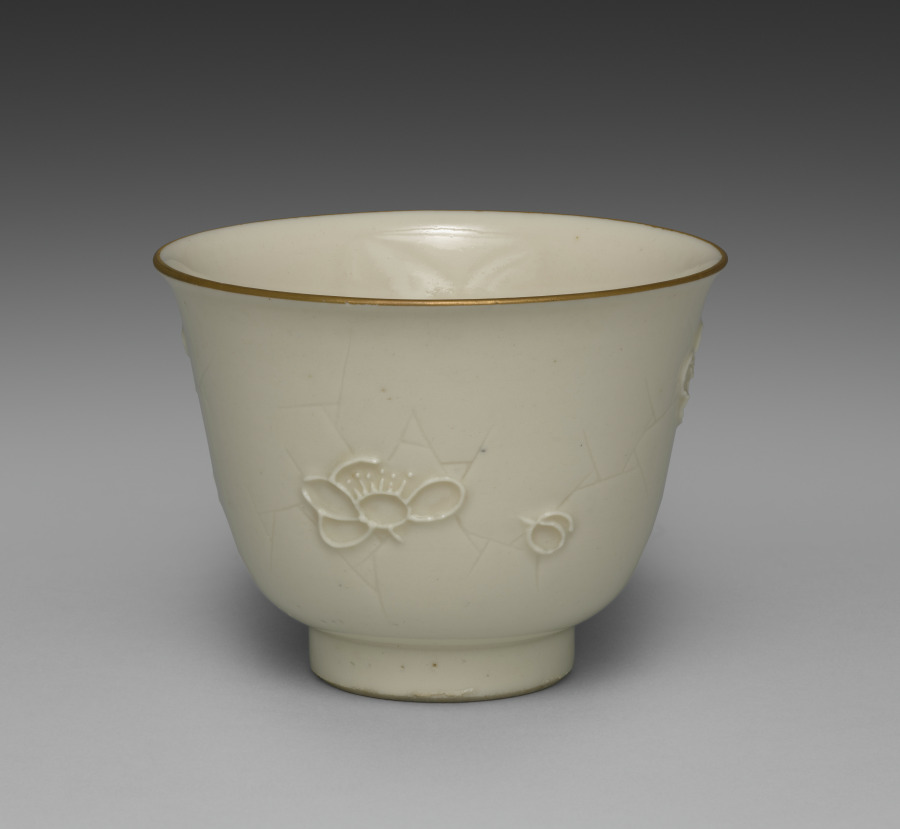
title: Drinking Cup from Dining Set with Plum Blossoms and Cracked-Ice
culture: Japan, Meiji period (1868–1912)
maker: Seifū Yohei II (Japanese, 1844–1878)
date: c. 1875–78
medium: Porcelain with molded designs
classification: Ceramic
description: Each item in this set has a delicate low-relief design of flowering plum branches over scattered, intersecting lines meant to resemble the cracked-ice surface of a frozen body of water and is signed on the base in gold pigment. While Yohei II produced many fine works in underglaze blue, like those produced by Kiyomizu Shichibei, he also made works in quite different styles later in his career, from the early 1870 s. In 1873, he was appointed purveyor to the Industrial Center of Kyoto Prefecture, a designation associated with Kyoto’s efforts to reach an international market through the port of Kobe; and from 1875 until his death, he was involved in national-level projects to present Japanese ceramics across the world. It was during this period that Yohei III was apprenticed to Yohei II, and it has been suggested that this set may in fact be an early example of Yohei III’s work, which he signed with his teacher’s name. Decorated with flowers resembling Japanese textile motifs, the set calls to mind the design of Yohei II’s pair of vases with plum blossoms in the Victoria and Albert Museum. Here, the elaborate trees created for a formal public exhibition setting have been translated into the approachable blossoms of the genteel domestic environment. While the designs are consistent across the pieces, each raised flower petal and pistil and each incised line in the ice was done by hand, so the cups, bowls, and dishes are similar yet unique. The bottoms of two boxes once identified the set’s owner, but the information has been deliberately obscured with black ink. However, inscriptions still visible appear to indicate two occasions, once at the end of July 1886 , and once again in June 1916 , when parts of the set were requested from Hokura in Niigata Prefecture. The location corresponds to a neighborhood in the present-day city of Jōetsu. The surname Tsuji 辻 also appears on a paper tag affixed to one of the box cloths. Future research may possibly reveal more about their provenance. A vase by Yohei III in a private collection combines the formal grandeur of the Yohei II vases in the Victoria and Albert Museum with the gentler design of this dining set, placing flowering plum trees against soft, scalloped-edge clouds resembling those in golden screens.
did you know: The dining wares have a creamy white coloration that the four boxes containing them identify as Korean in style.